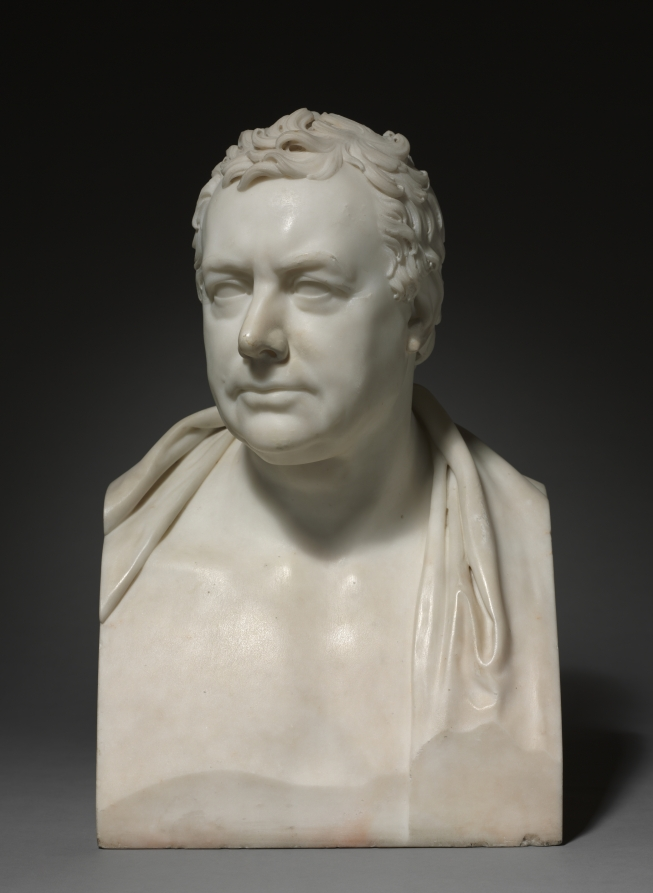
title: Sir H. C. Englefield, Bart.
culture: England, 19th century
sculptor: Francis Legatt Chantrey (British, 1781–1841)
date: 1818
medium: marble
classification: Sculpture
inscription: inscribed left side: Chantrey/Sculptor/1818; rear: Sir H. C. Englefield, Bart.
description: To modern eyes, a bare-chested portrait of a man in his mid-60s might seem undignified. However, it was fashionable for gentlemen of Englefield’s generation to be portrayed in this manner, deliberately referencing the antique sculptures of Roman statesmen they admired. As a Catholic, Englefield was barred from taking part in politics in England; however, he was a member of several clubs devoted to the amateur study of art, science, and history. Among these were the Society of Dilettanti, which championed the works of antiquity and promoted the creation of modern art in the same spirit—like this marble bust by celebrated sculptor Francis Legatt Chantrey.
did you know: Initially, Chantrey tried to establish himself as a portrait painter. After 1805, he painted only on occasion and from 1811–20, he became the leading portrait sculptor in Regency Era Great Britain.